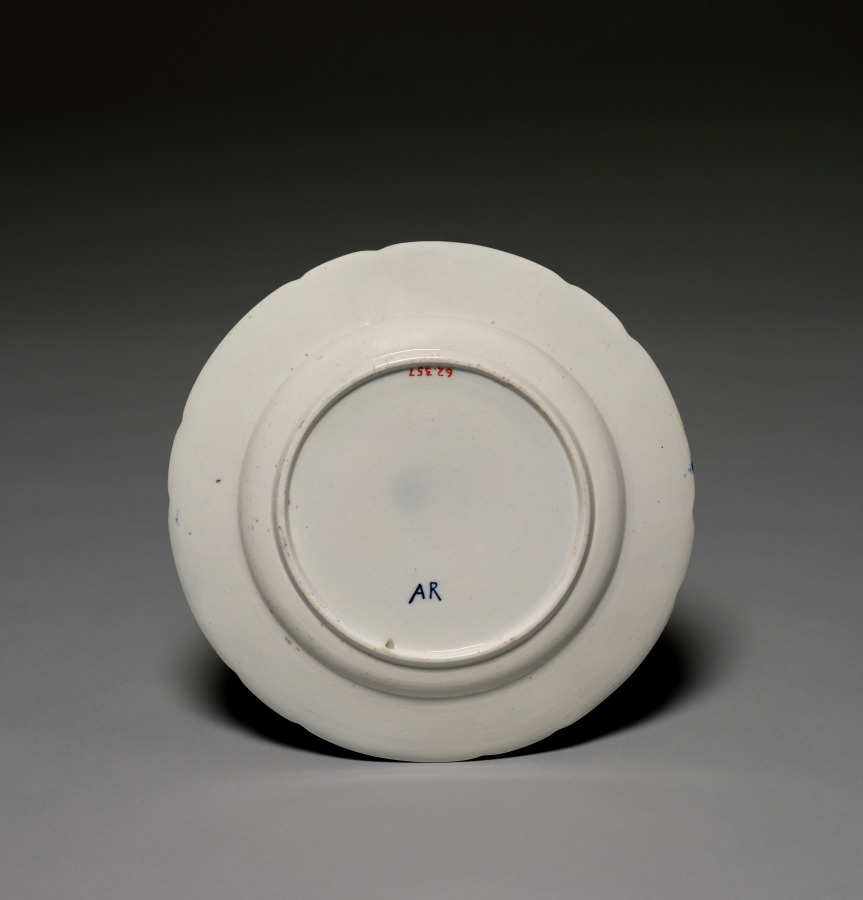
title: Plate (Assiette)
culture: France, 18th century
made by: Arras Porcelain Factory (French)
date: c. 1775–90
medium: soft-paste porcelain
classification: Ceramic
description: The porcelain factory of Arras was founded in 1770 with the financial backing of the County of Artois. This plate, with its striking cobalt blue on a milky-white ground, was typical of its short-lived 20 years in porcelain production. The sprigs of stylized cornflowers that decorate the center of this plate, a motif known in France as barbeaux, were popularly reproduced on porcelain during the last quarter of the 1700s.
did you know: The barbeaux pattern was notably used by the Chantilly porcelain factory in the 1770s and was generally produced in either blue or green.